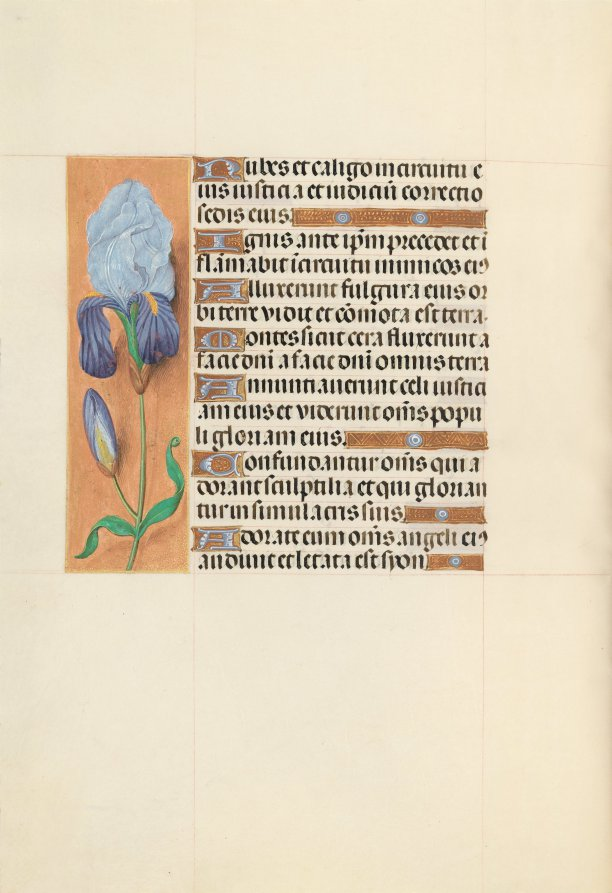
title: Hours of Queen Isabella the Catholic, Queen of Spain: Fol. 108v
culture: Flanders, Ghent and Bruges, late 15th century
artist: Master of the First Prayerbook of Maximillian (Flemish, c. 1444–1519)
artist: and Associates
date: c. 1500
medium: ink, tempera, and gold on vellum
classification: Bound Volume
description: This manuscript was illuminated by a circle of at least five highly organized manuscript painters active in the Flemish cities of Ghent and Bruges. The principal illuminator was Alexander Bening, who painted the majority of the book's miniatures. Manuscripts produced by this circle of artists are renowned for the decoration of their borders, which typically feature a rich variety of realistically-painted flowers, birds, and butterflies. This prayer book, called a book of hours, was intended not for a cleric, but for the private devotions of a lay person-in this case, Isabella the Catholic, Queen of Spain (1451-1504). Isabella's coat of arms embellishes the book's frontispiece. It is unlikely that the book was commissioned by the Queen herself; rather, she probably received it as a diplomatic gift from someone courting her patronage, perhaps Cardinal Francisco Jimenez de Cisneros. A Franciscan friar, Jimenez was dependent upon Isabella for his advancement, first to the post of Queen's confessor in 1492, and then to Archbishop of Toledo in 1495.